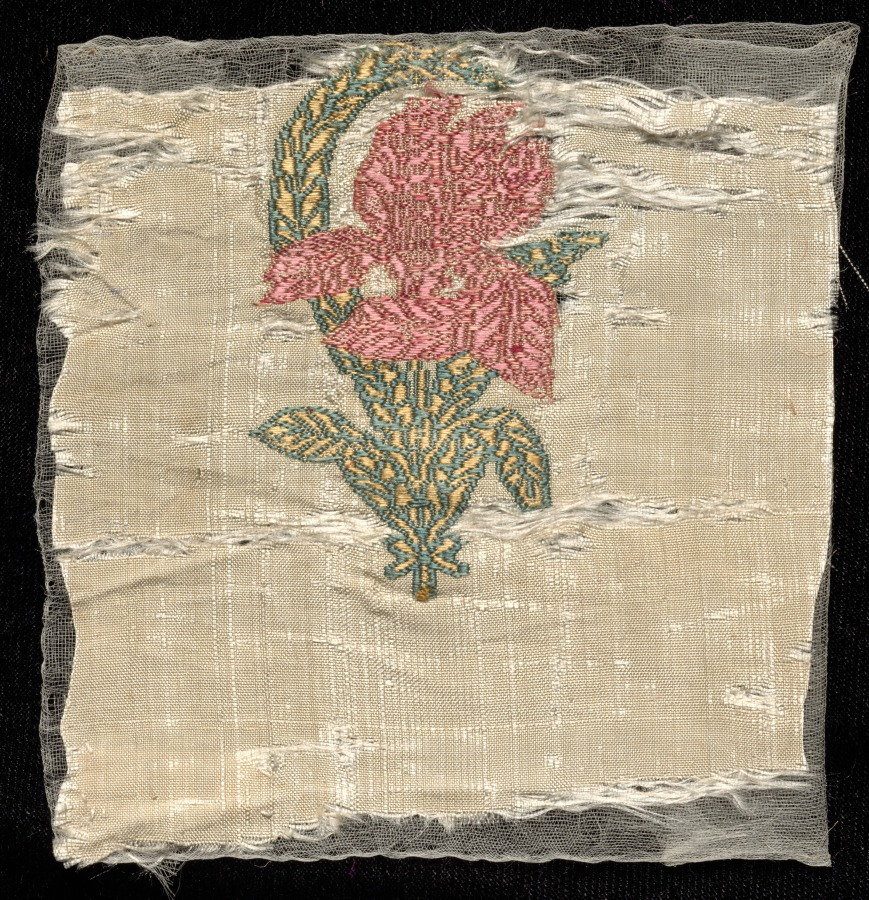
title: Fragment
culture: India, 19th century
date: 1800s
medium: brocade; silk and metal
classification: Textile